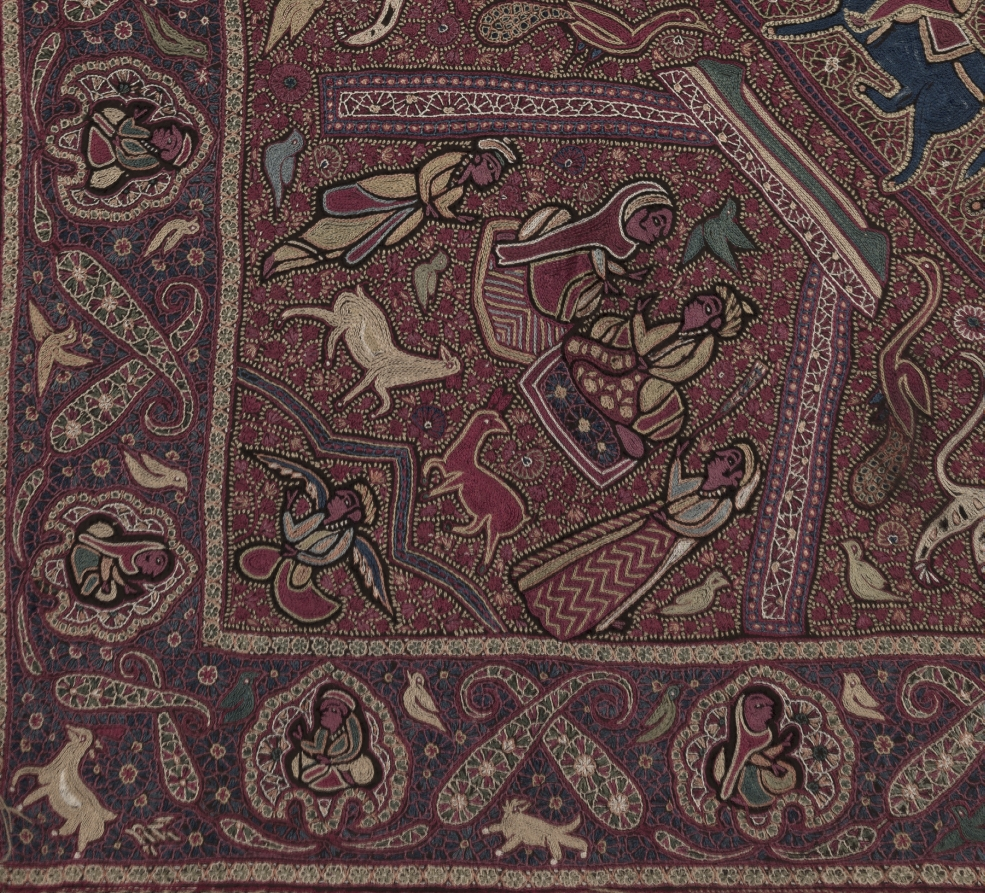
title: Square Shawl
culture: India, Kashmir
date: c. 1850–70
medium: Silk and silver filé, wool: chain stitch embroidery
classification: Embroidery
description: By the 1800s, the Himalayan foothill region of Kashmir was renowned for distinctive embroideries, and Kashmiri shawls were coveted by women throughout the British Empire. The center of this square shawl is in the form of an eight-petaled lotus, a symbol for the sun, and around it are the elongated forms of slender cypress trees, which became the inspiration for paisley. Every space is populated with figures: seated, standing, male, female, or playing musical instruments. Others are winged heavenly figures called peri. Birds are the only animals in these central spaces, suggesting a heavenly realm. In the next concentric ring riders in an equestrian procession alternate with flying birds. In the spandrels, the triangular sections between the circle and the square, are gatherings under a tent with animals. Some local Himalayan animals can be identified, such as the spotted snow leopard and the snake-eating markhor goat.